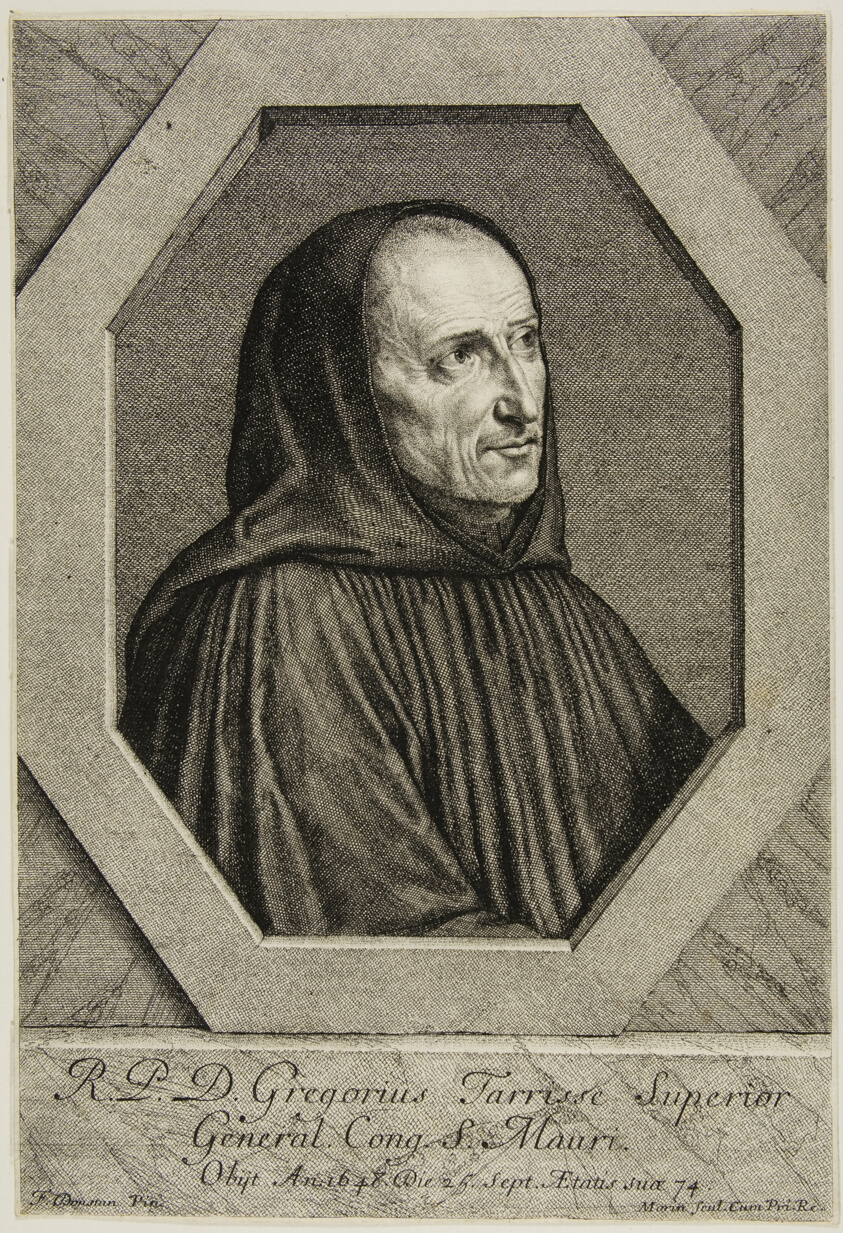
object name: Print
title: Dom Jean-Grégoire Tarisse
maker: Jean Morin (French, c. 1590-1650)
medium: Engraving and etching on paper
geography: France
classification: etching; print; prints and drawing